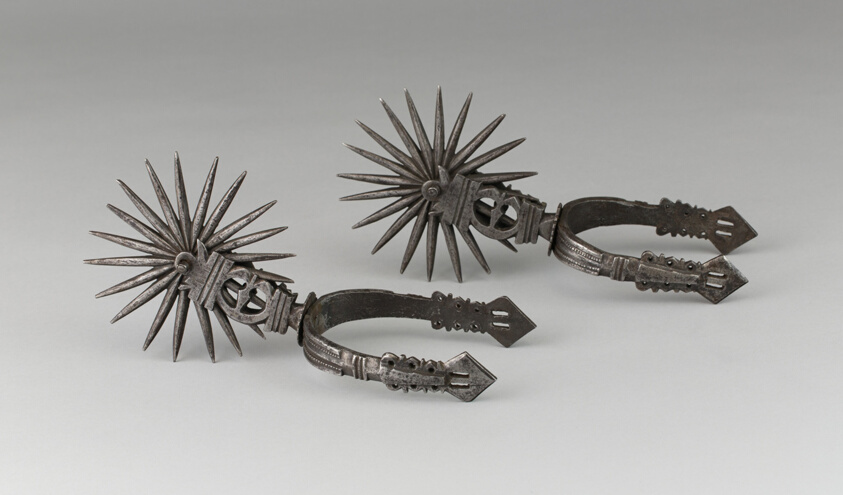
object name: Armor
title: Pair of Spurs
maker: Chilean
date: 19th century in 16th century style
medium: Iron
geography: Chile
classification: horse equipment; armor; arms and armor